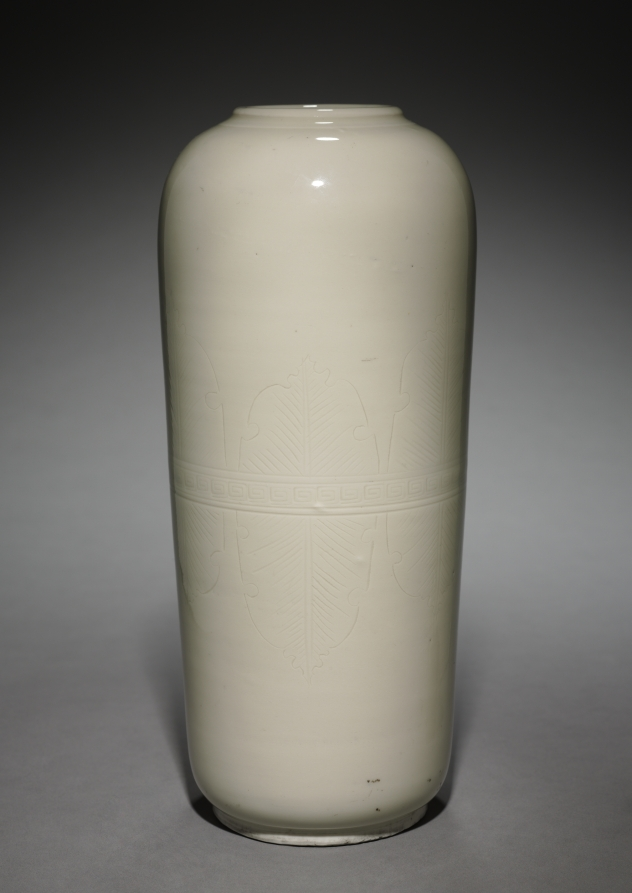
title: Vase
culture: China, Qing dynasty (1644-1911)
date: 1644–1911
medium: porcelain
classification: Ceramic